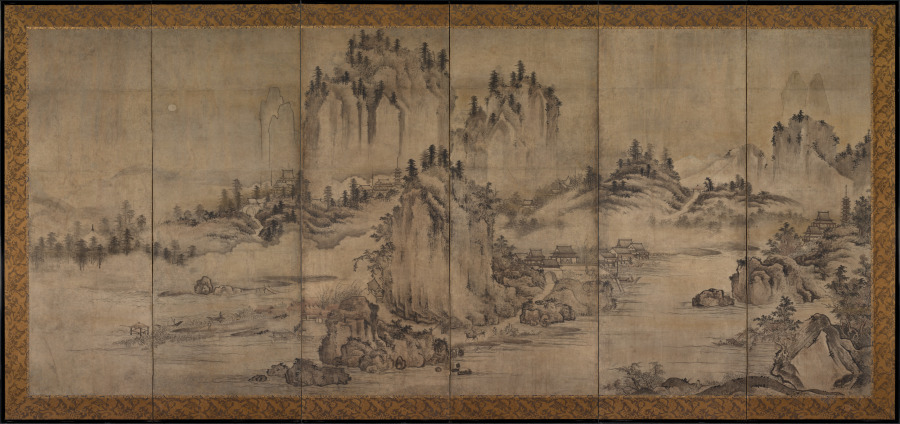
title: Landscape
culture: Japan, Muromachi period (1392–1573)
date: 1550–99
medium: One of a pair of six-panel folding screens; ink and color on paper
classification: Painting